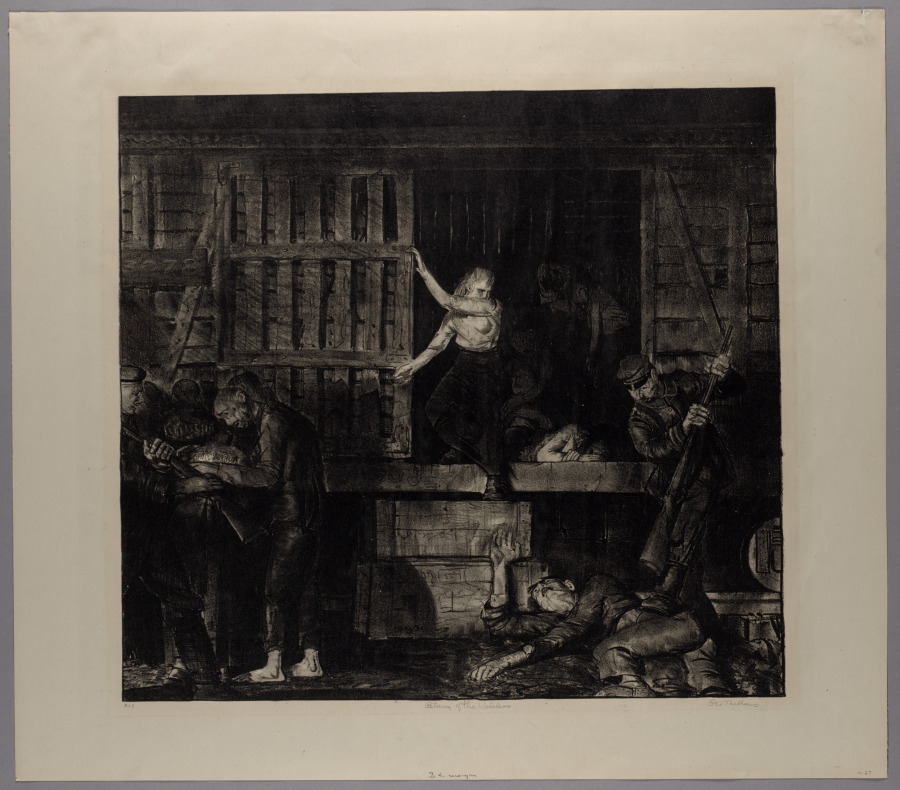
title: War Series: The Return of the Useless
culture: America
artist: George Bellows (American, 1882–1925)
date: 1918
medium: lithograph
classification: Print